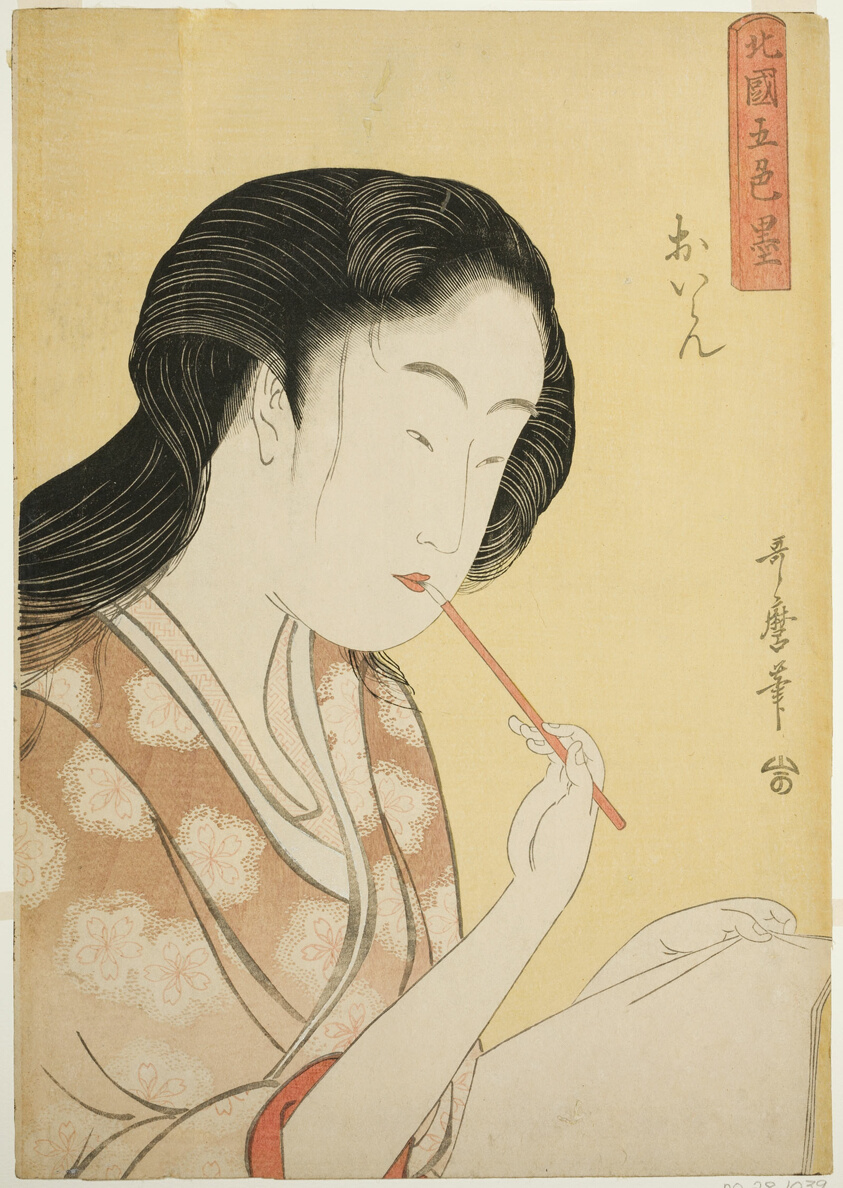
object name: Print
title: High-Ranked Courtesan, from the series Five Shades of Ink in the Northern Quarter (Hokkoku goshiki-zumi) (Oiran)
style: Japanese (culture or style)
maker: Kitagawa Utamaro 喜多川 歌麿; Japanese, 1753 (?)-1806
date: c. 1794/95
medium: Color woodblock print; oban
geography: Japan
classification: woodblock print; print; asian art